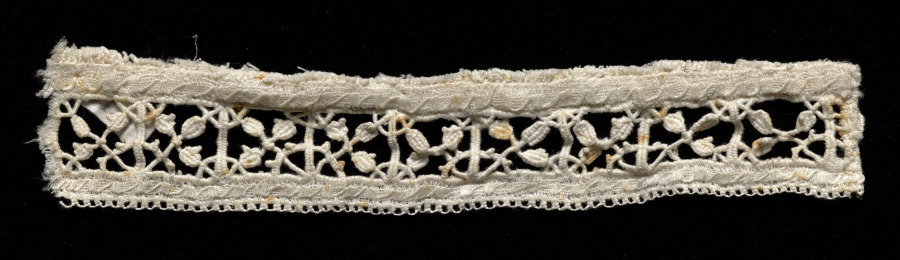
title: Edging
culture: Italy, Venice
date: 1500s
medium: Linen: needle lace (reticella)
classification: Lace